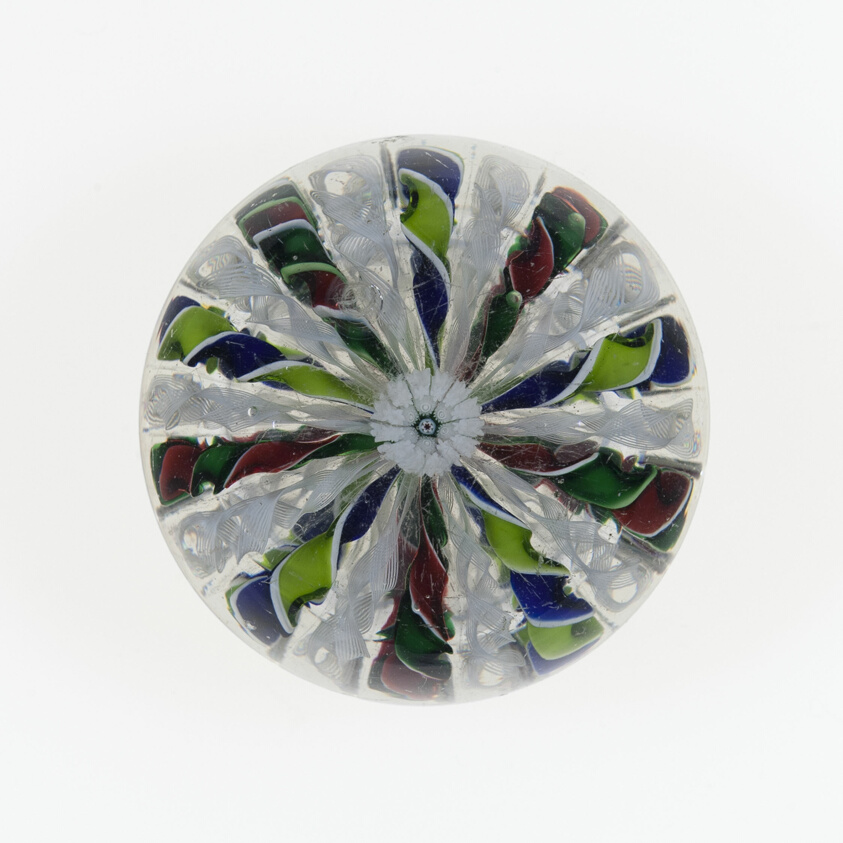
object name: Glass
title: Paperweight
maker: Saint-Louis Glassworks (Cristalleries de Saint-Louis); Lorraine, France, founded 1586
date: c. 1845–55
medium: Glass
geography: Saint-Louis-lès-Bitche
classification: paperweight; sulphide (glass); european decorative arts; glass